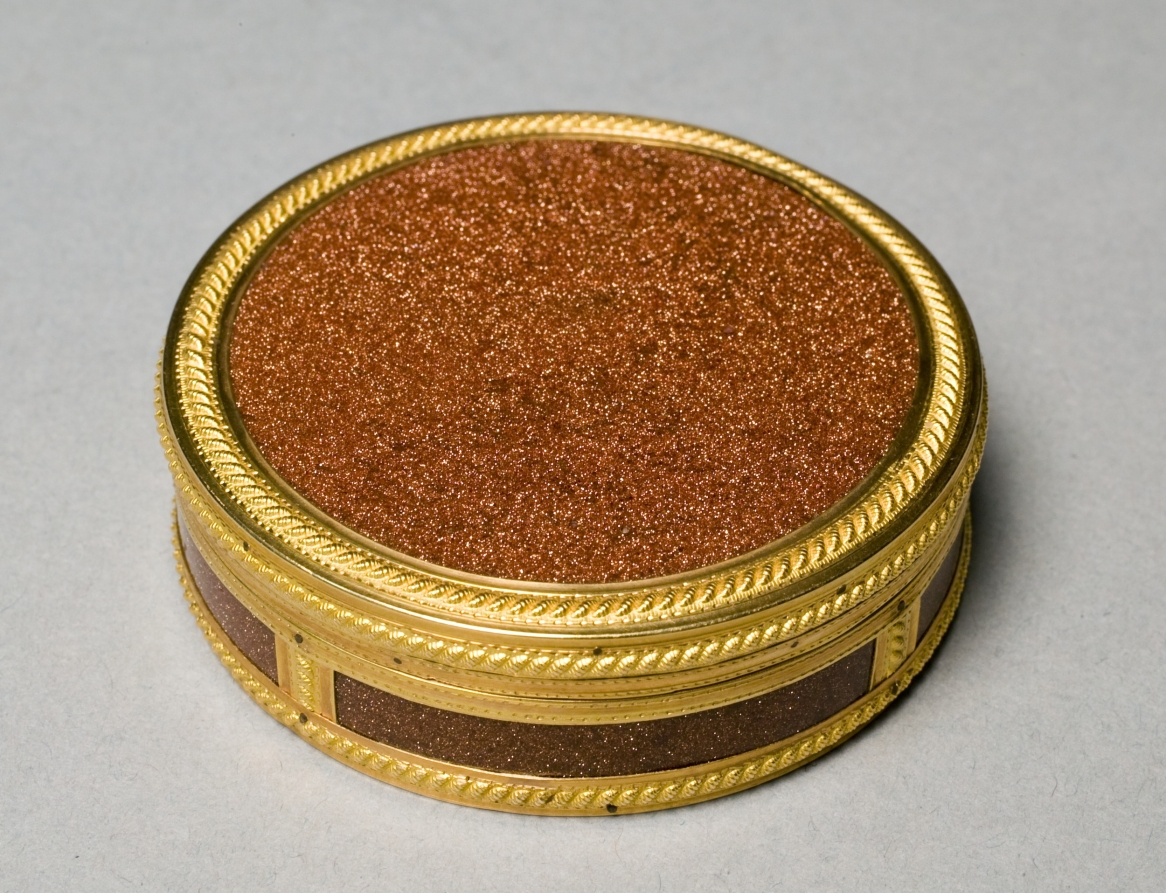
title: Powder or Patch Box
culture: France, Paris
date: c. 1780–89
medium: averturine, gold, interior lined with tortoiseshell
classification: Miscellaneous